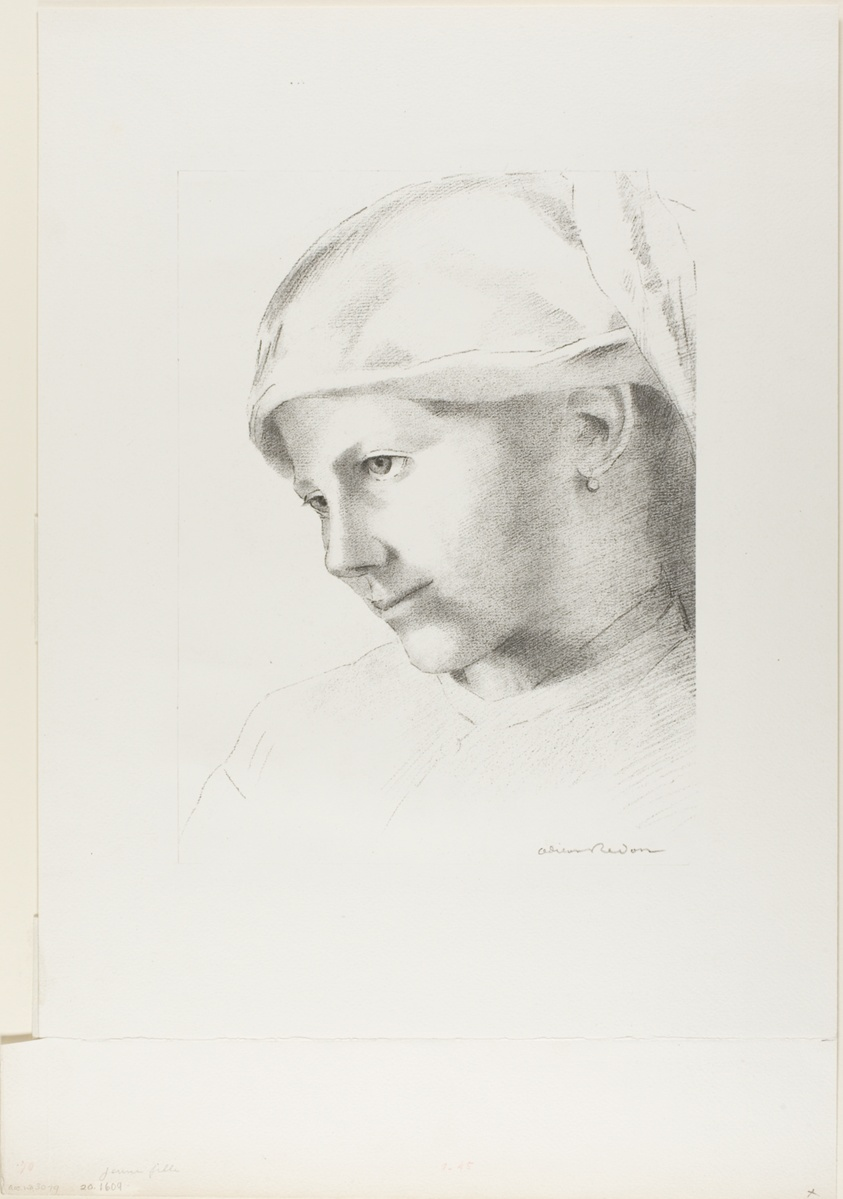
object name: Print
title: Girl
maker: Odilon Redon (French, 1840-1916)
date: 1887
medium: Lithograph in black on heavy white wove paper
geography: France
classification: lithograph; print; prints and drawing; paper